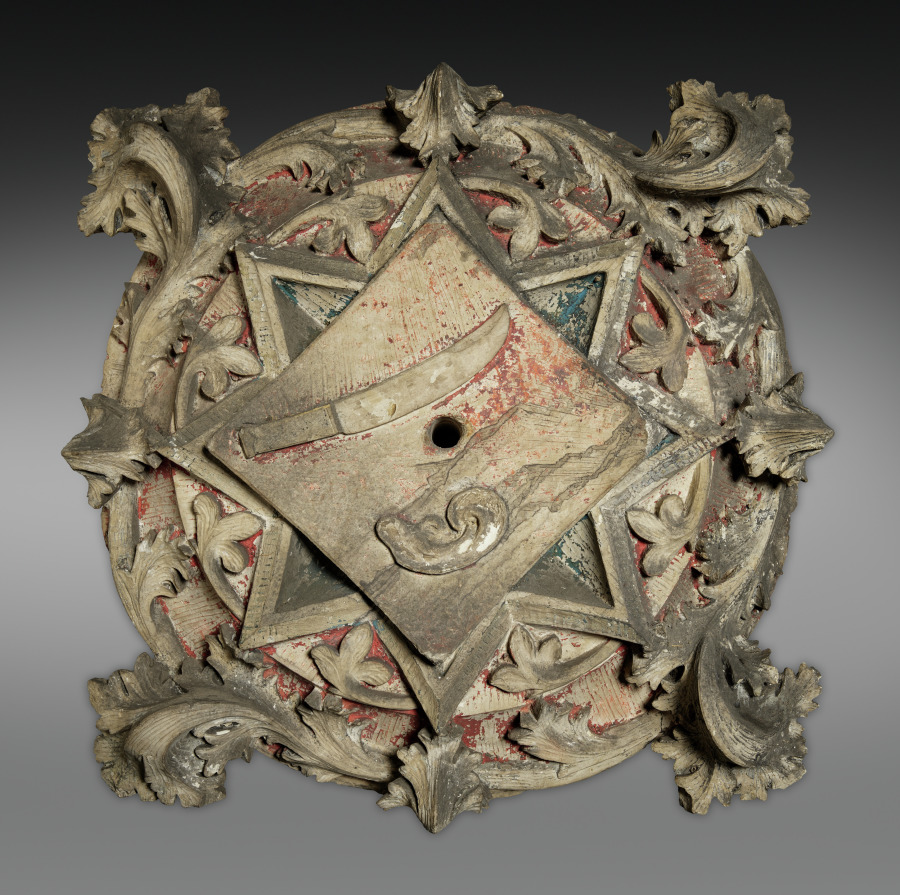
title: Roof Boss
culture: Northern Spain, 15th century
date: 1400s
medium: limestone with traces of polychromy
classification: Sculpture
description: In medieval architecture, a "boss" refers to an ornamentally carved, often painted and gilded, keystone. It was placed at the intersection of ribs in a vaulted roof in order to lock its members into position. Noteworthy examples are found in many of Europe's monastic cloisters and cathedrals. This example and the other shown nearby are reportedly from the vaulted ceiling of a monastery in Northern Spain. Their principal decorative motif consists of a spray of acanthus leaves.